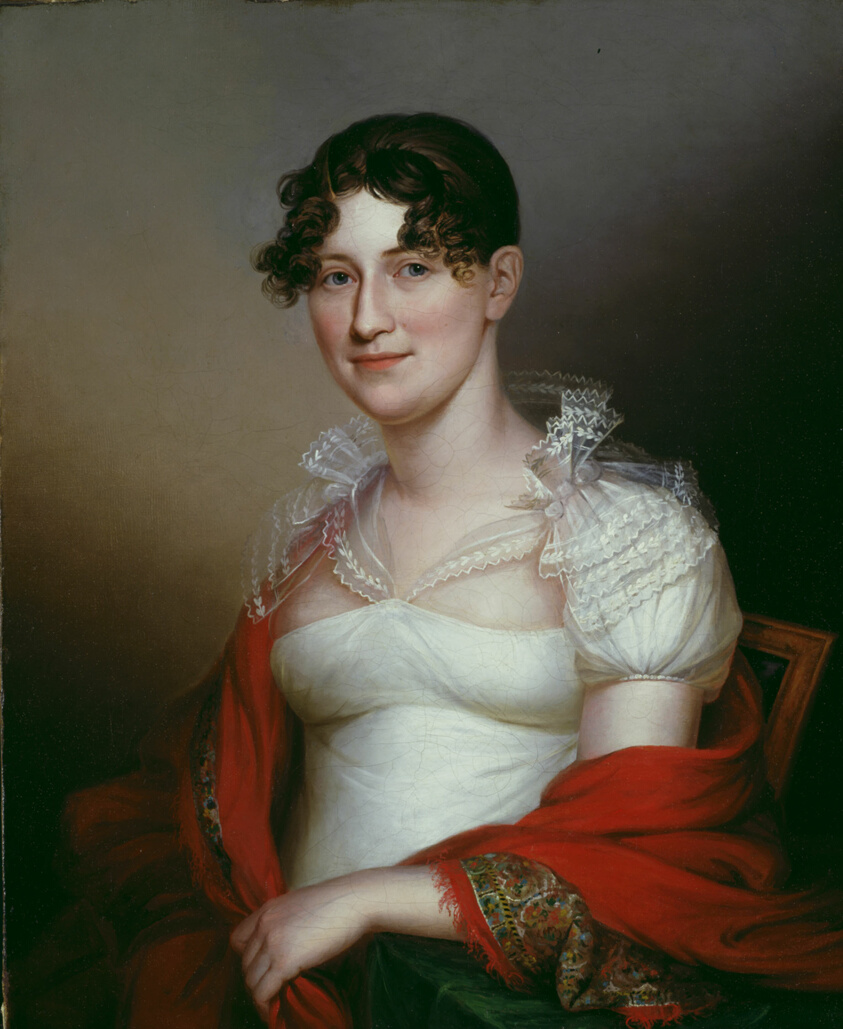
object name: Painting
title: Olivia Simes Morris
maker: James Peale (American, 1749–1831)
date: 1814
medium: Oil on canvas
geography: United States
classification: painting; american arts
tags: fashion, people, portraits